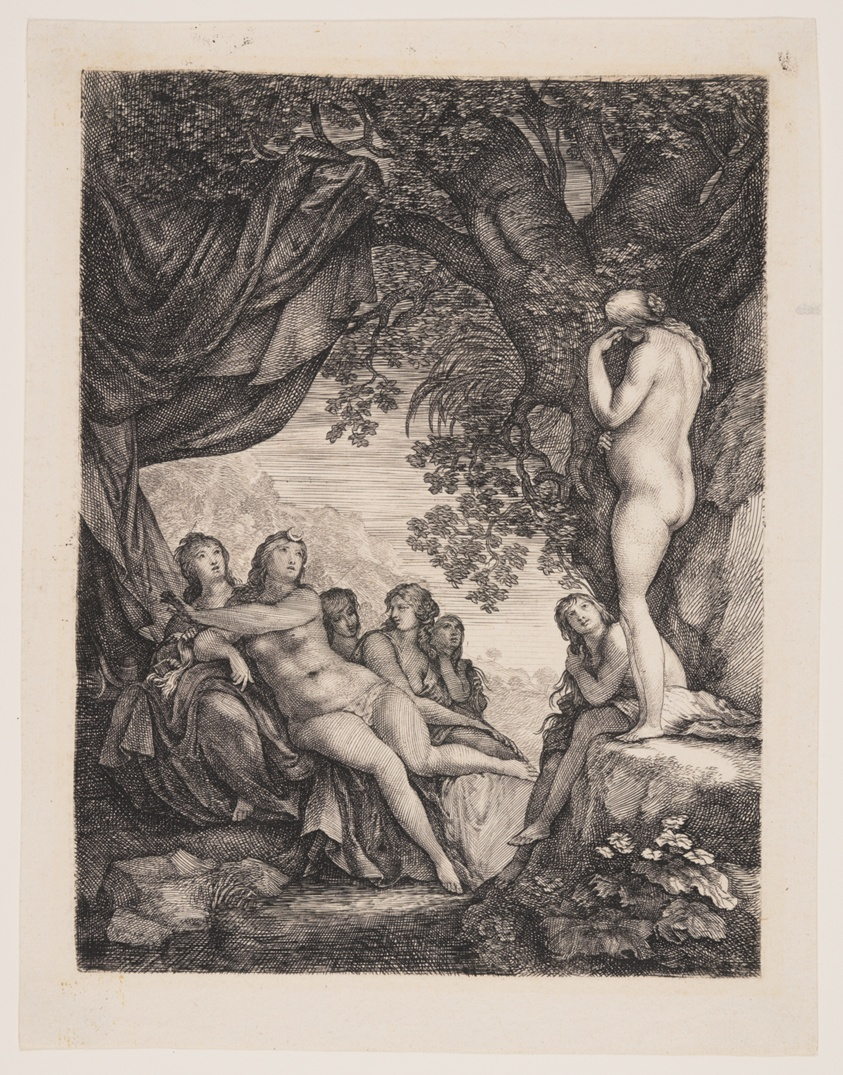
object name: Print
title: Diana and Callisto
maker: Moses van Uyttenbroeck (Dutch, c. 1595–before 1647)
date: c. 1615-1645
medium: Engraving on laid paper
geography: Netherlands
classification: engraving; paper; print; prints and drawing